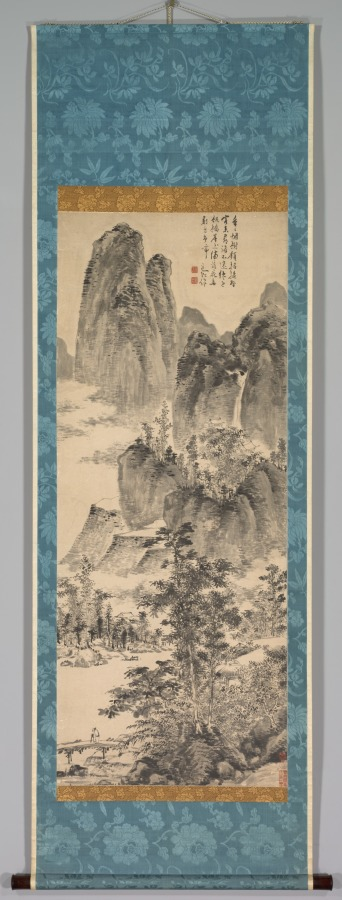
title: Looking for a Monastery in the Misty Mountains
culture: China, Ming dynasty (1368–1644)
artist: Chen Chun (Chinese, 1483–1544)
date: 1500–1544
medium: hanging scroll, ink on paper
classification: Painting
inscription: Artist's inscription, signature, and 2 seals: Row after row of misty trees envelop the Buddhist Monastery./ But the rustic who comes to find it will not lose his way./ Just across the wooden bridge, the dusty world is cut off;/ Among the countless falling petals, birds are singing confusedly. Daofu 道複 composed [this]. [seals] Fufu shi 復甫; Baiyang shanren 白陽山人. trans. WKH/LYSL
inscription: 3 additional unidentified seals.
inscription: 1 additional unidentified seal on the back of the mounting.